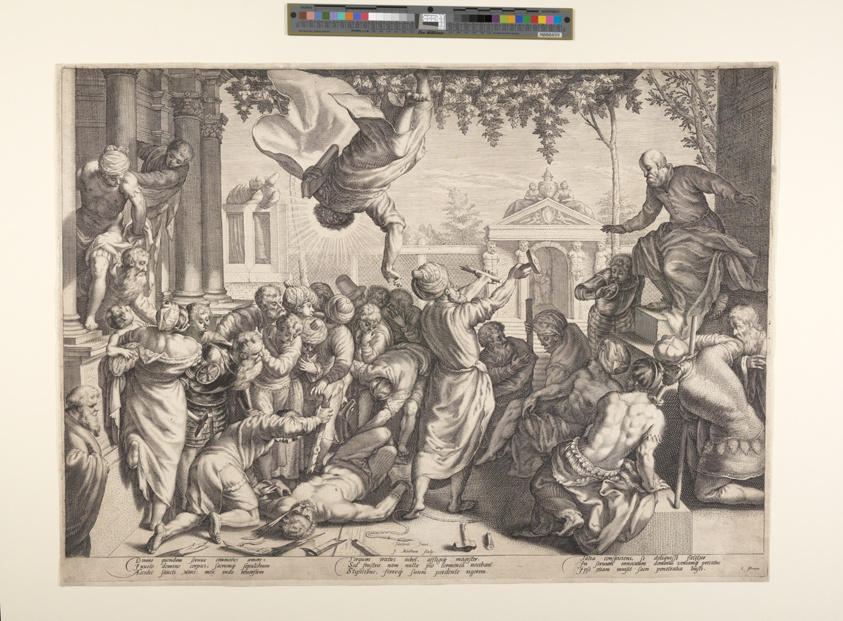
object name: Print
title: The Miracle of the Slave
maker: Jacob Matham (Dutch, 1571–1631); after Tintoretto (Italian, 1518–1594)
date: c. 1597-1600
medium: Engraving on ivory laid paper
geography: Netherlands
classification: engraving; paper; print; prints and drawing